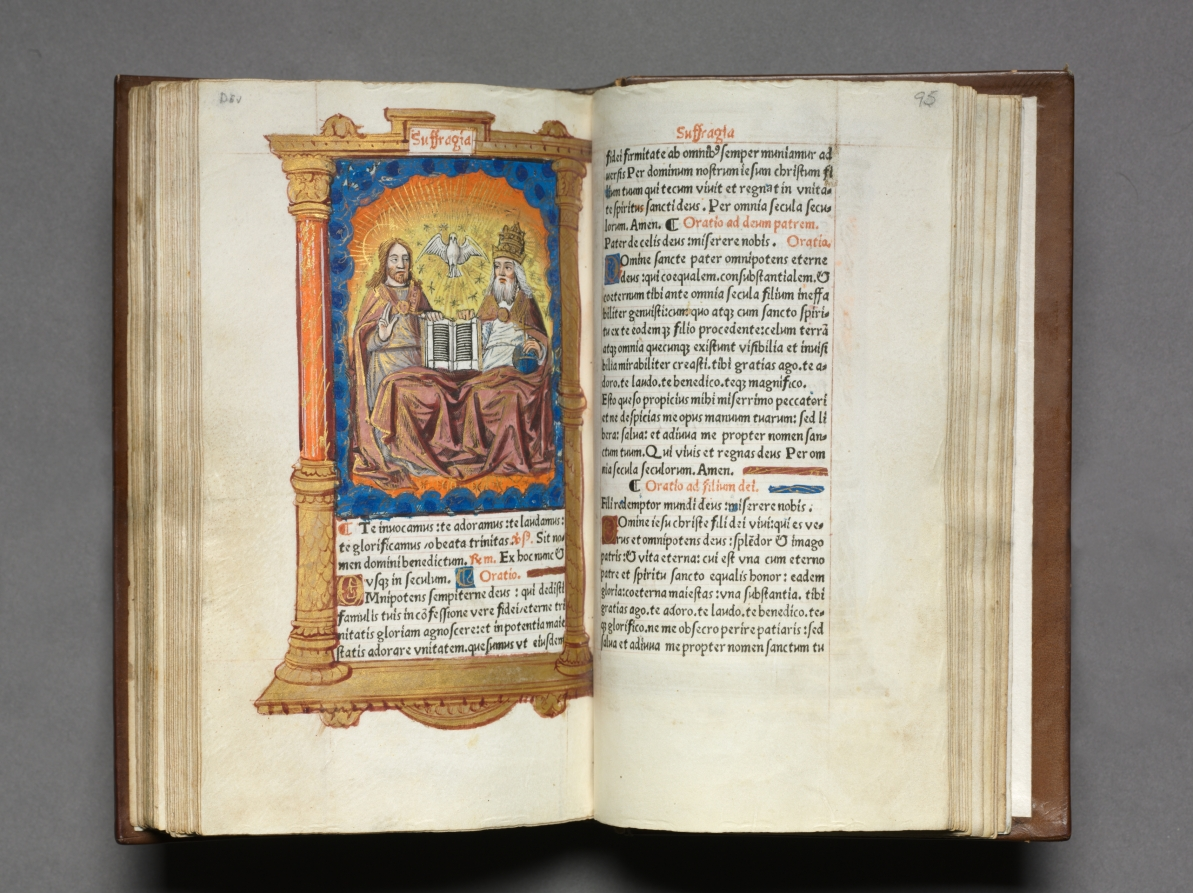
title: Printed Book of Hours (Use of Rome): fol. 94v, The Trinity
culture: France, Paris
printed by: Guillaume Le Rouge (French, Paris, active 1493–1517)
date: 1510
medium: 112 Printed folios on parchment, bound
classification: Bound Volume